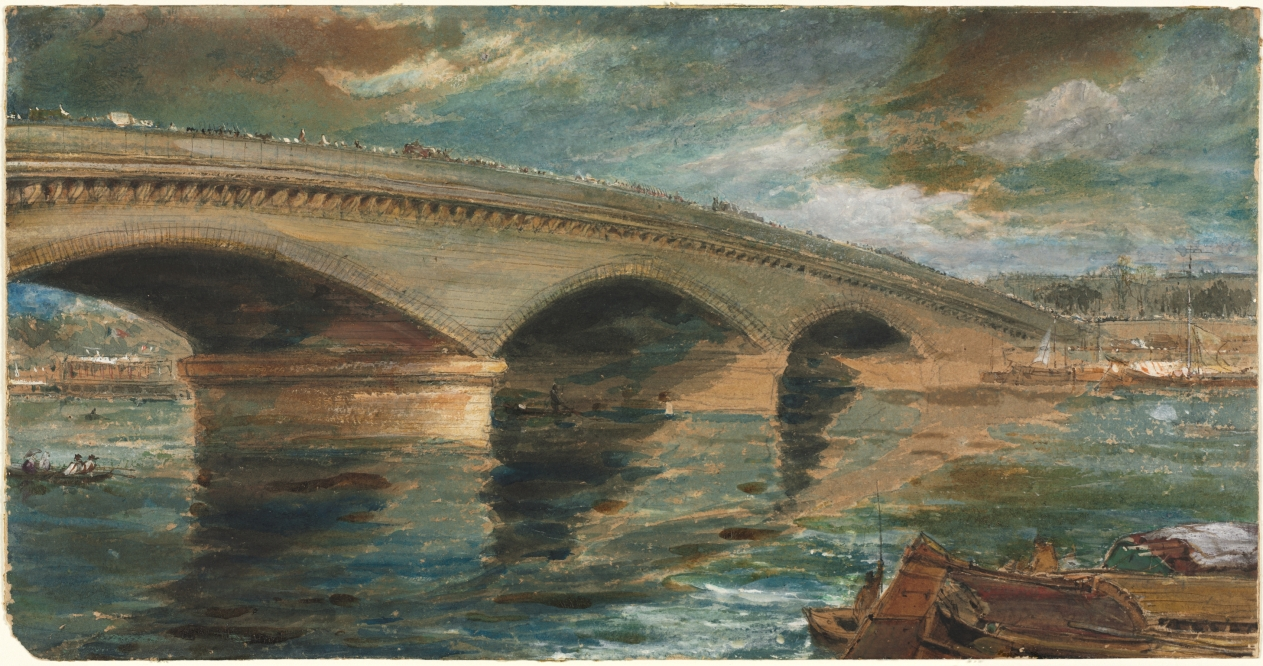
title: London Bridge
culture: England, 19th century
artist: James Holland (British, 1800–1870)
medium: watercolor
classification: Drawing